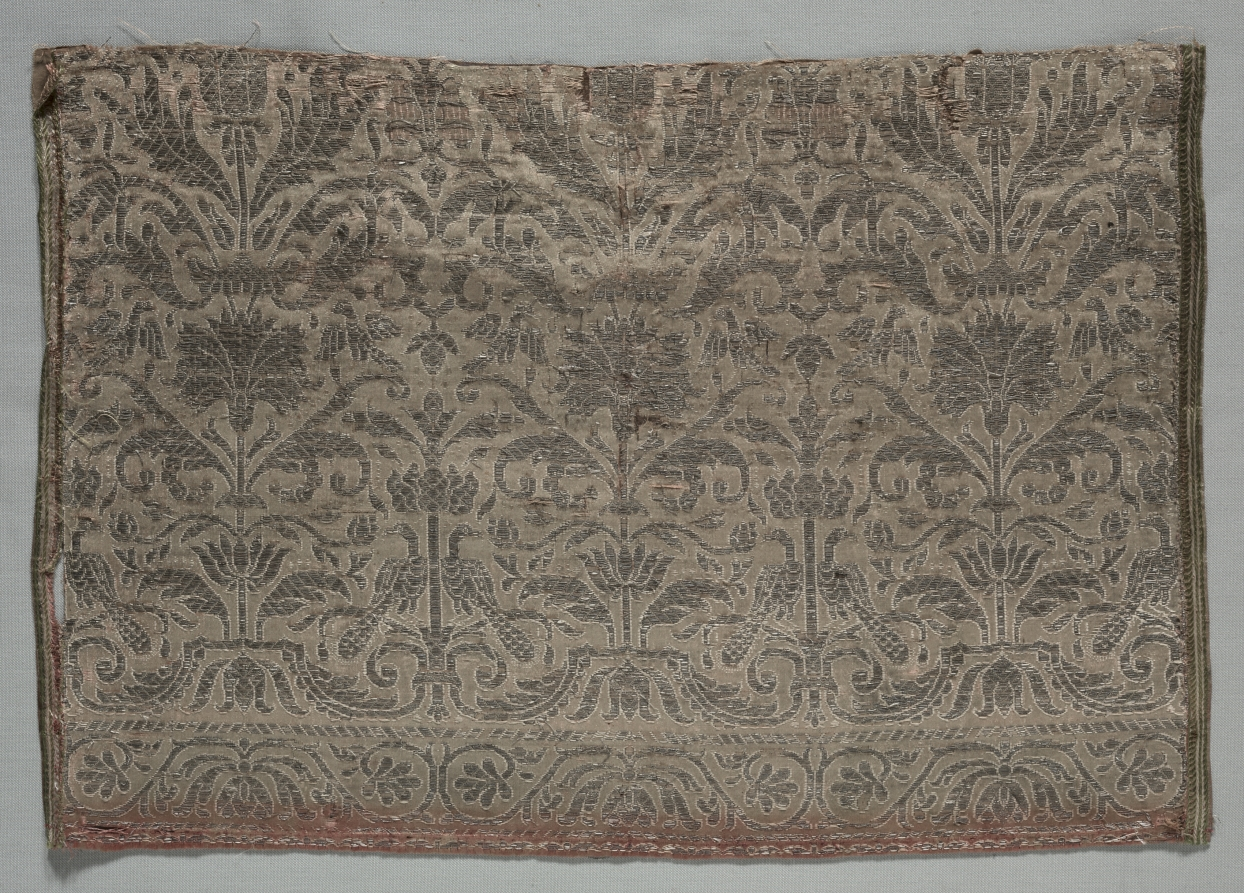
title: Textile Fragment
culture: Italy, 17th century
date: 1600s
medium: brocade; silk and metal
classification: Textile